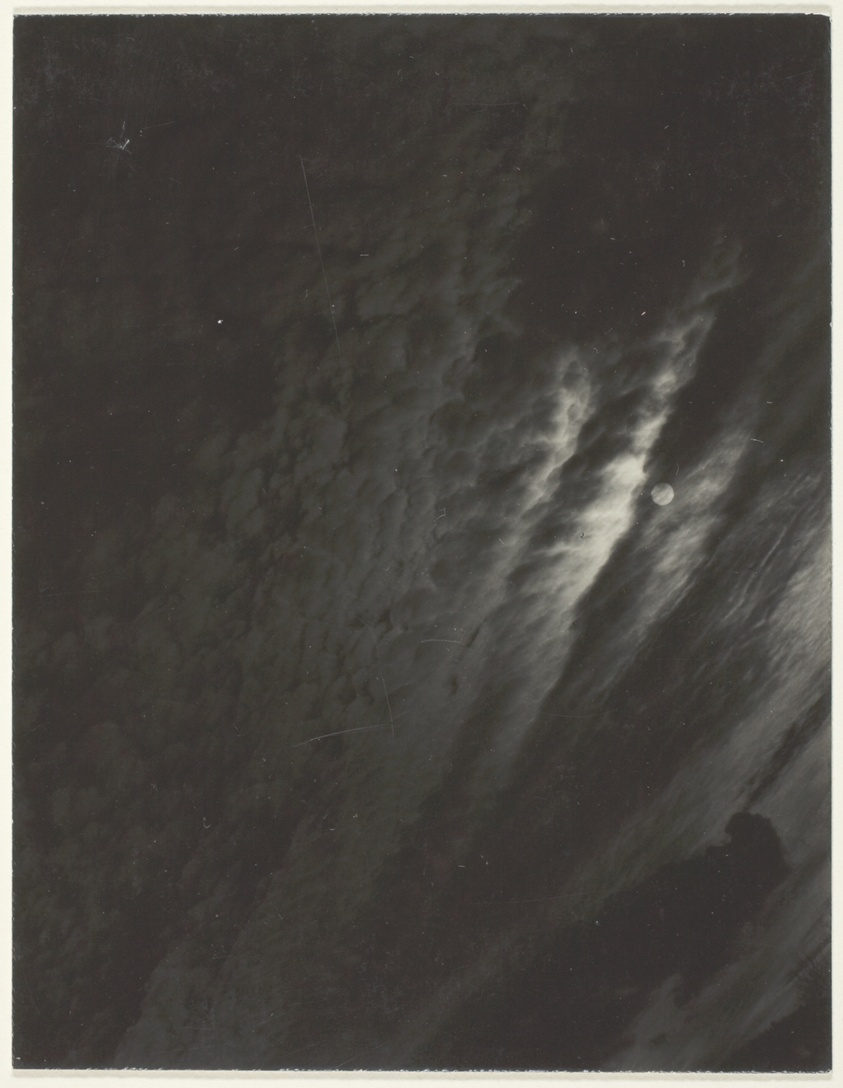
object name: Photograph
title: Equivalent, from Set A (Third Set, Print 4)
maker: Alfred Stieglitz (American, 1864–1946)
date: 1929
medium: Gelatin silver print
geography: United States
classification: gelatin silver (developing-out-paper) pr; photographic process; photography; photograph